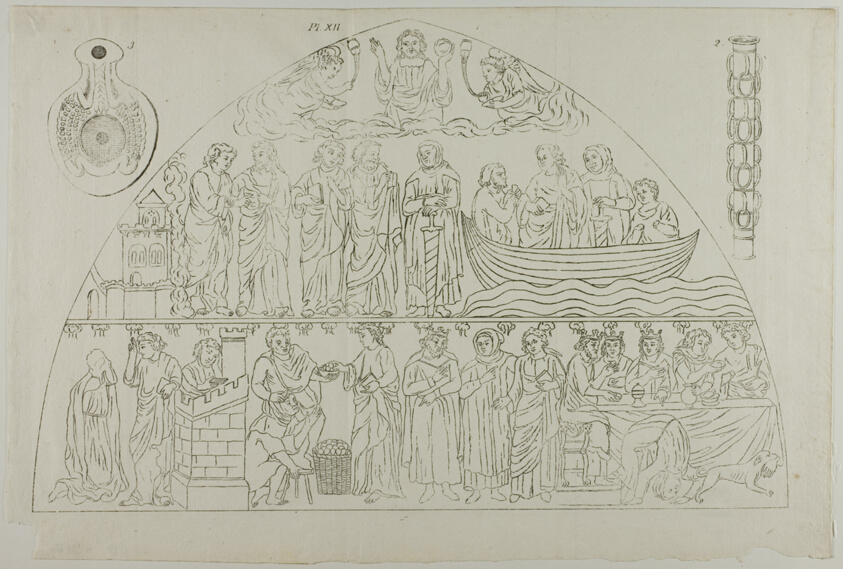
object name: Print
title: Three Images from Millin's Atlas, plate XII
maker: Aubin-Louis Millin (French, 19th Century); printed by André Frédérick (French, 18th-19th Century)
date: 1807–08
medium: Lithograph in black on ivory laid paper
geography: France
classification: lithograph; print; prints and drawing